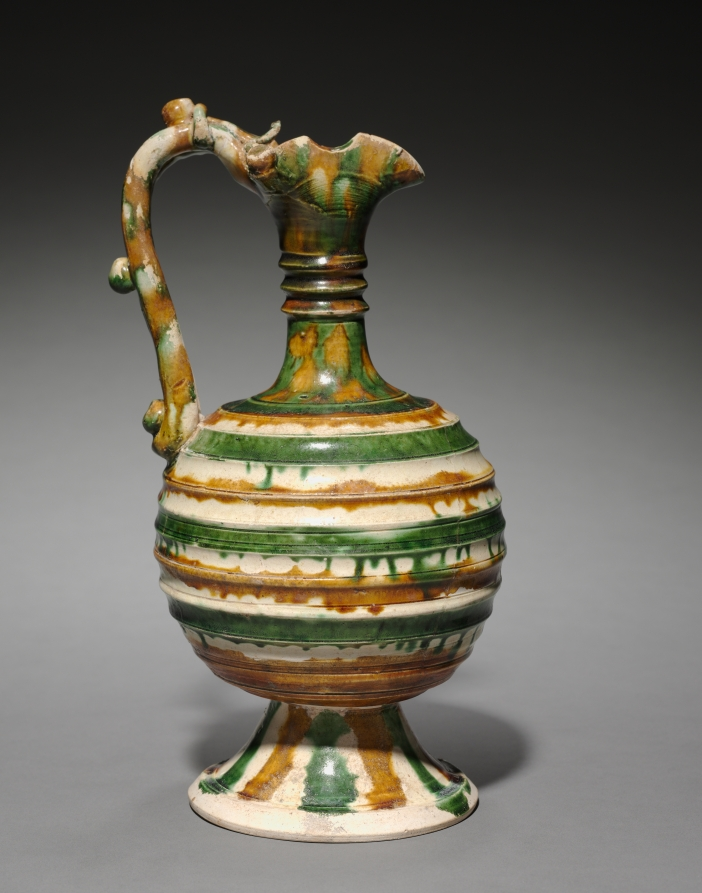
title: Ewer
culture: China, Tang dynasty (618-907)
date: 700–750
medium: glazed earthenware, sancai (three-color ware)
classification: Ceramic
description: Many sancai or "three-color" lead-glazed wares-such as this ewerare notable for their heavy dependence on metalwork prototypes. Such polychrome glazed wares were intended for the tomb.